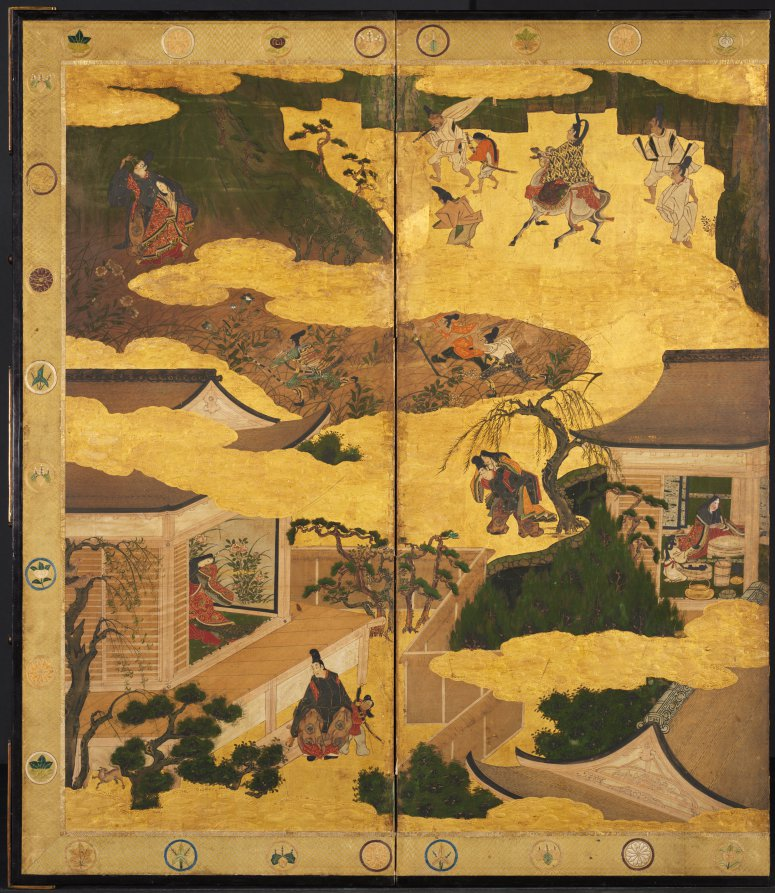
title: Scenes from the Tales of Ise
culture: Japan, Edo period (1615–1868)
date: mid-1600s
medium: One of a pair of six-panel folding screens; ink, color and gold on paper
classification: Painting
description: While the 11th-century Tale of Genji is universally regarded as Japan's literary masterpiece, the source for visual imagery in Japanese culture is rivaled by another literary classic, the Tales of Ise. A 10th-century anthology of poems interspersed with commentary, the Ise portrays the emotional and geographical journey of a courtier from the capital (Kyoto) into the countryside and beyond. The poems describe features of the natural, untamed terrain, linking them to the rather melancholy state of the traveler. Since the Tales of Ise was—and remains today—well read by educated Japanese, a person viewing these folding screens would immediately recognize its subject, organized as a series of discrete scenes read from right to left. Neither a signature nor a seal identifies the artist, but judging from related paintings, the work can be ascribed to an artist working in Kyoto during the first quarter of the 17th century in the manner of the painter Iwasa Matabei (1578–1650). This type of historical narrative composition became quite popular around 1600 among patrons favoring a distinctly Japanese style of painting which employed rich mineral pigments and a liberal use of gold.